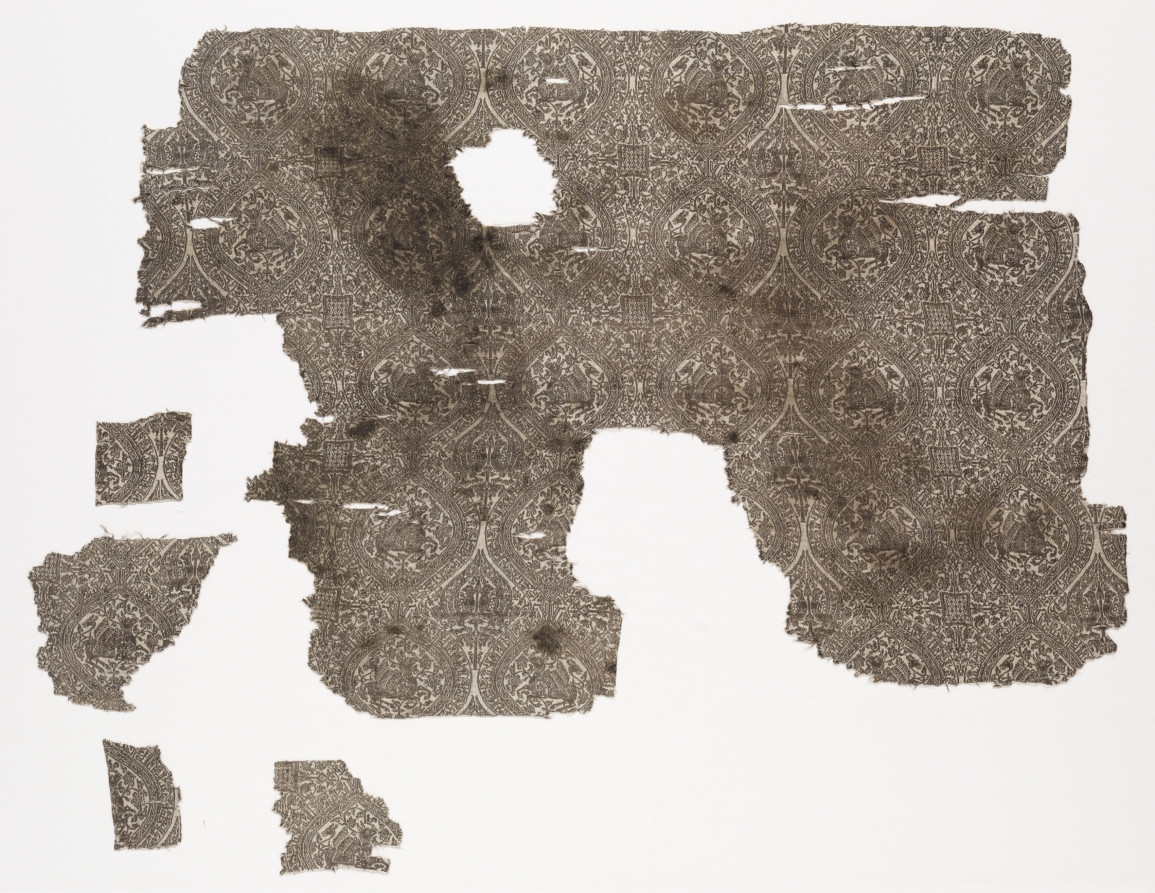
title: Ogives with Winged Quadrupeds and Peacocks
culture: Iran ?, in the style of the Buyid period (945–1055)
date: 1517–1950 (radiocarbon date, 95% probability)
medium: Silk: lampas weave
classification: Textile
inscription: "kull ibn untha wa-in talat salamatuhu yawman 'ala alah badba' mahmul"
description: The design consists of aligned ogives in 4-1/2 rows and part or all of 6 columns; each ogive contains a running winged quadruped with an animal head. Floriated motifs emerge from the end of the tail and fill the interstices. The double border consists of an inner band with scrolling vine and an outer band of kufic inscription. Resulting columns of diamond-shaped interspaces are alternately ornamented with squares filled with diaper pattern on a foliate field and a pair of confronting, regardant peacocks flanking a tree of life.